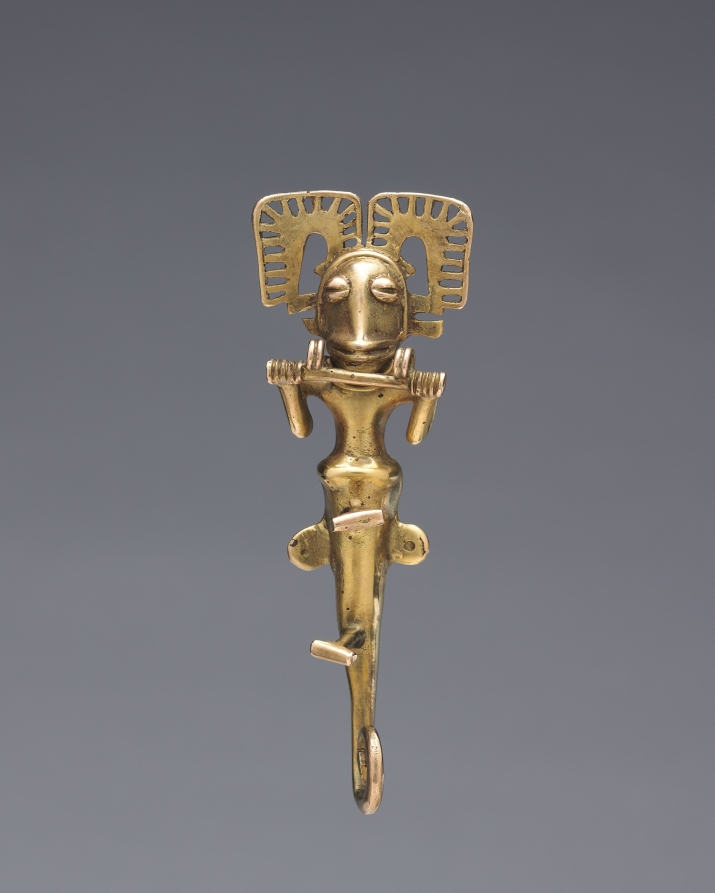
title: Pendant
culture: Panama, International Style, 5th-7th century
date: 400–700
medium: cast gold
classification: Metalwork